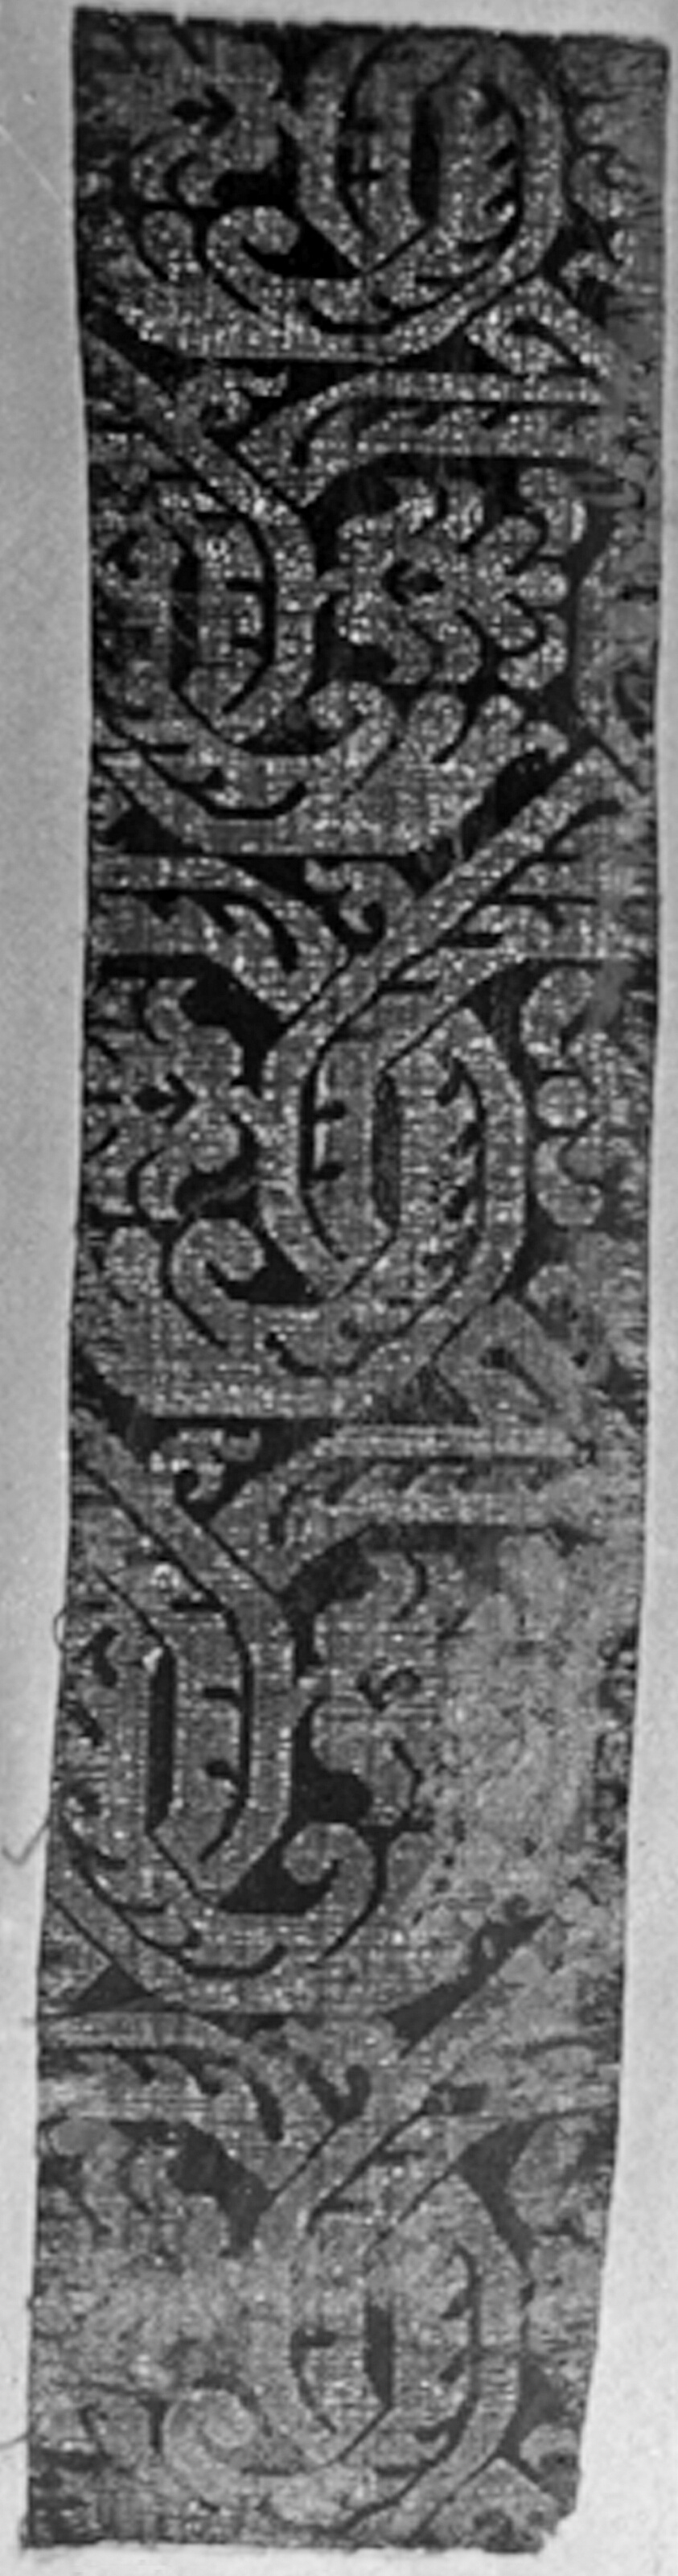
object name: Textile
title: Fragment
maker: Italy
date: Early 17th century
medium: silk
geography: Italy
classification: textile; weaving